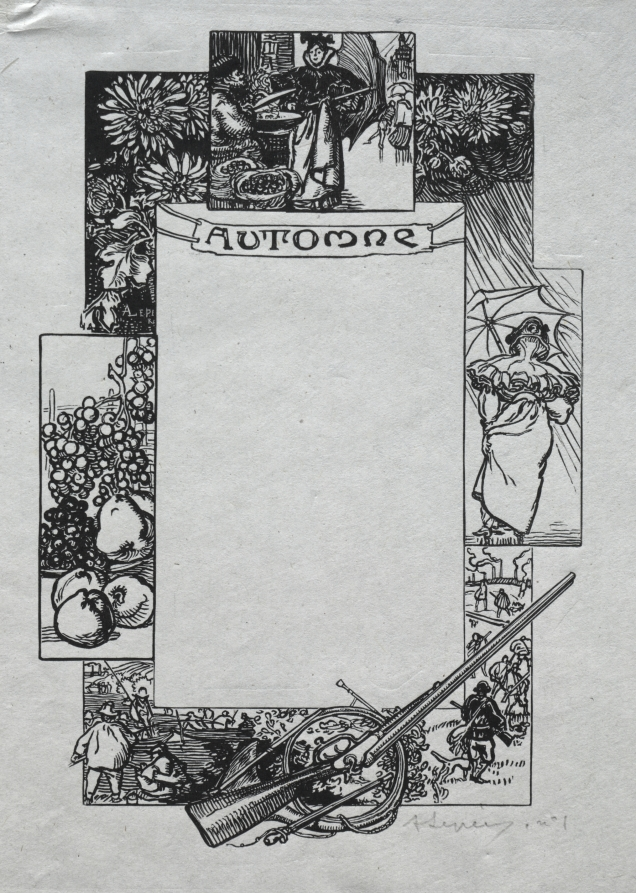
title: Paris Almanac, 1897: Decorative Border, Autumn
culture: France, late 19th Century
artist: Auguste Louis Lepère (French, 1849–1918)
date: 1897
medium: wood engraving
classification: Print